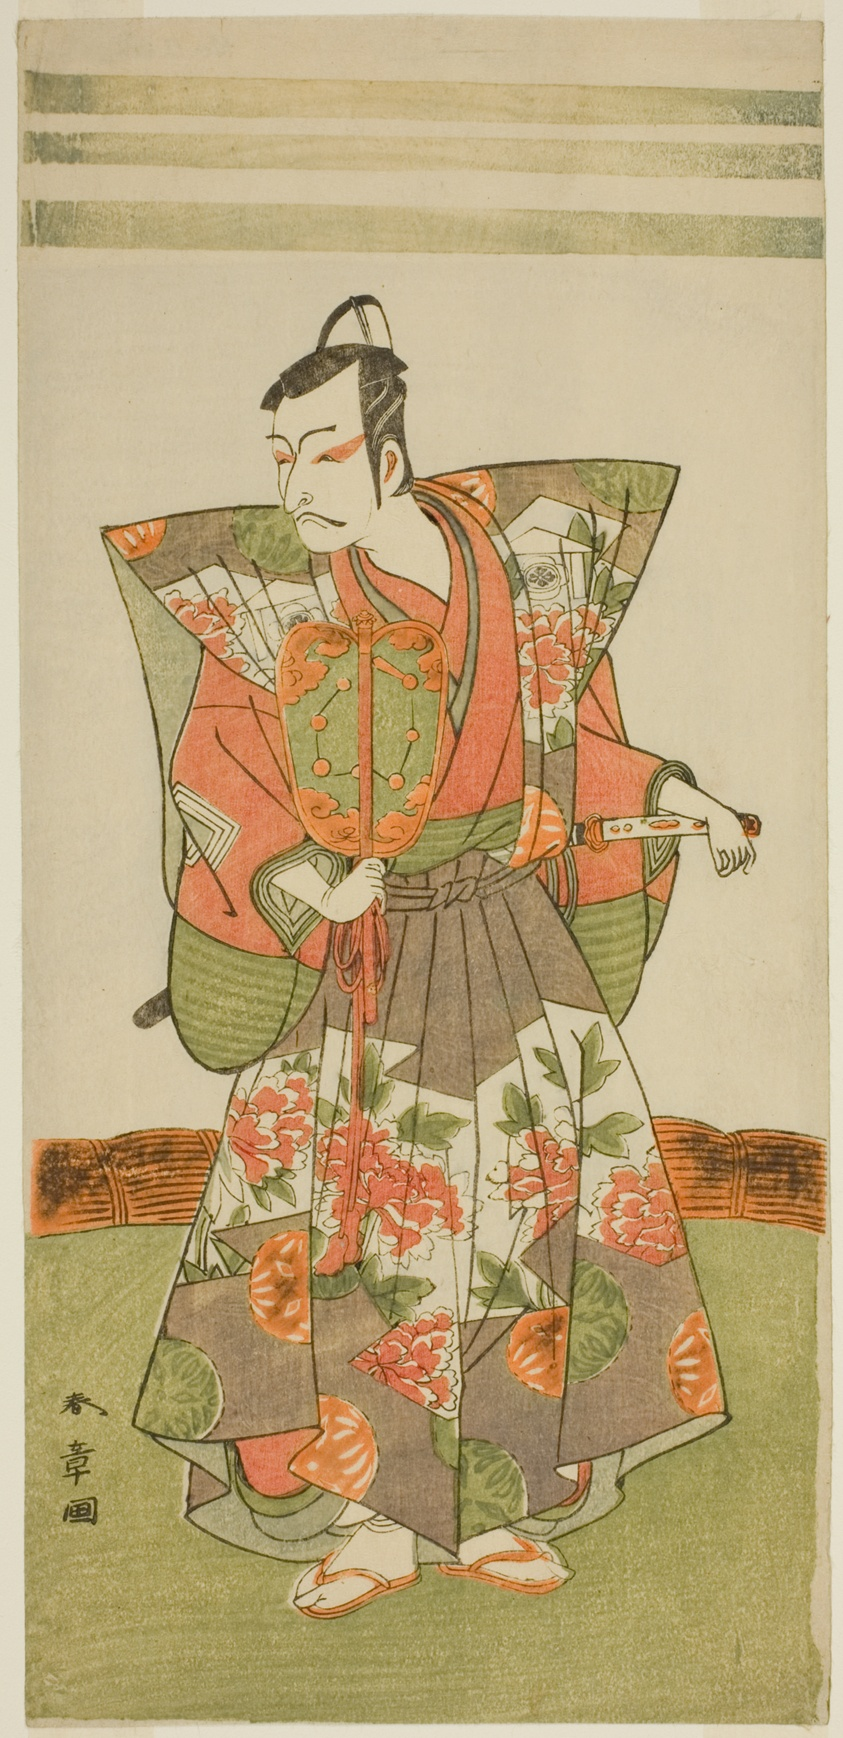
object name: Print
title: The Actor Ichikawa Danjuro V as Kudo Kanaishi in the Play Izu-goyomi Shibai no Ganjitsu, Performed at the Morita Theater in the Eleventh Month, 1772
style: Japanese (culture or style)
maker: Katsukawa Shunsho 勝川 春章; Japanese, 1726-1792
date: c. 1772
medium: Color woodblock print; hosoban; center sheet of triptych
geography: Japan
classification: woodblock print; print; asian art